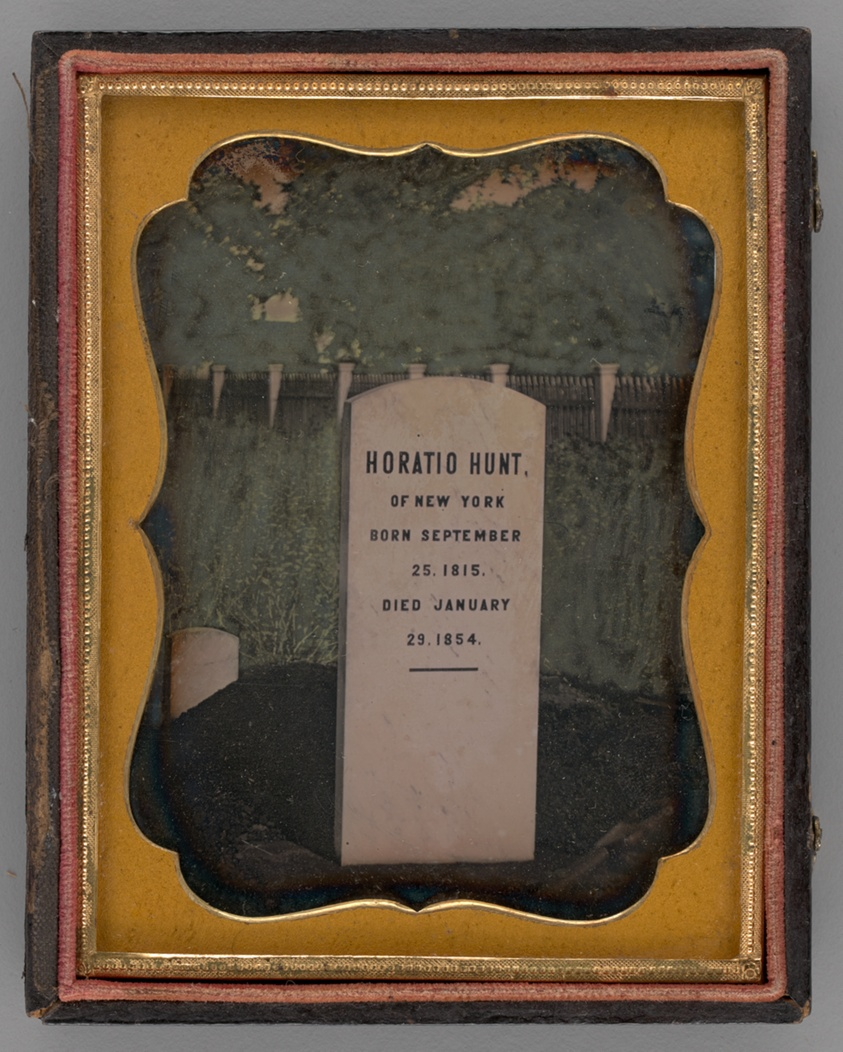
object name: Photograph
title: Untitled (Grave)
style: 19th century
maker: Unknown maker; American, 19th century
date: 1854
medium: Daguerreotype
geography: United States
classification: photography; daguerreotype; portrait; portrait; photograph; photographic process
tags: lundberg collection, graves